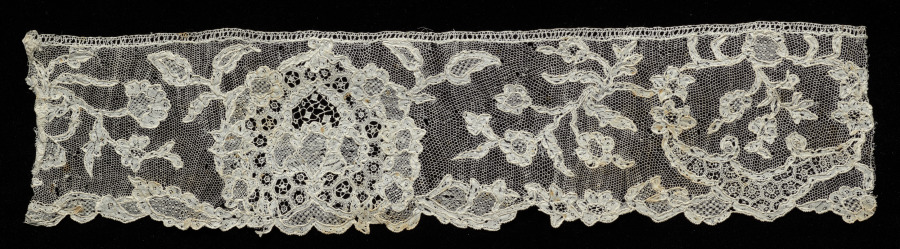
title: Fragment of Lace Edging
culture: Italy, Burano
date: 1700–1740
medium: Silk: needle lace (Burano Point)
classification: Lace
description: The motifs seen in this lace fragment are Regency or early Louis 15th patterns.